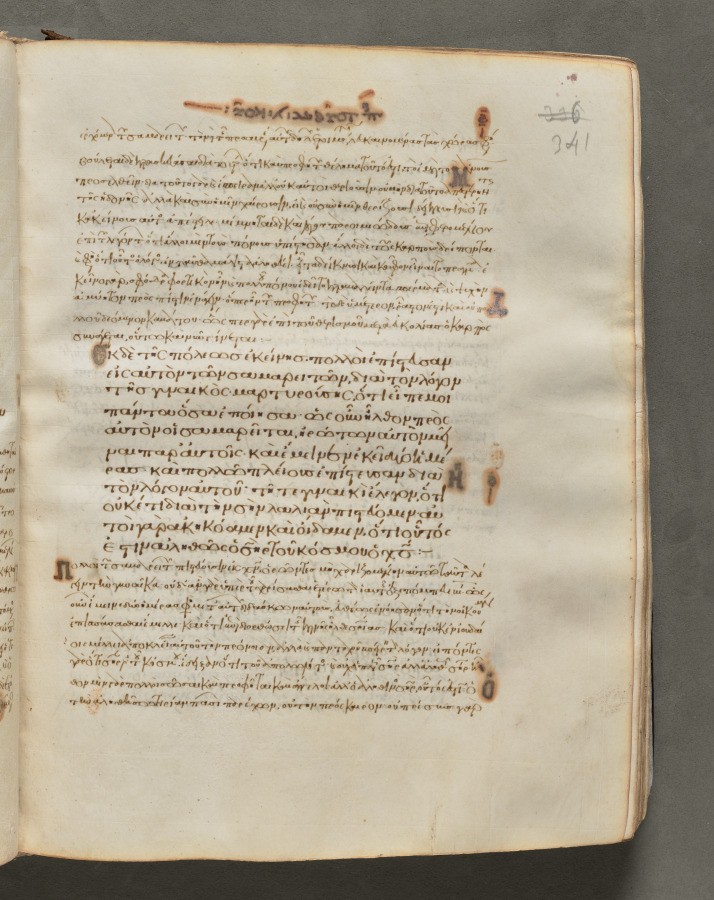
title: Text, folio 341 (recto), from a Gospel Book with Commentaries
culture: Byzantium, Constantinople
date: c. 1000–1100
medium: ink, tempera, and gold on vellum; leather binding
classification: Bound Volume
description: Each of the four gospels in this book opens on a page with brilliantly illuminated borders depicting the author of the text as well as birds—principally peacocks, symbols of the immortality of the soul—and fountains, representing the fountain of life and the salvation of the soul. This volume consists of 428 leaves with texts in Greek. Its level of sophistication suggests that it was probably written and decorated in a monastery in Constantinople.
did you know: Gospel books were carried in procession through Byzantine churches.